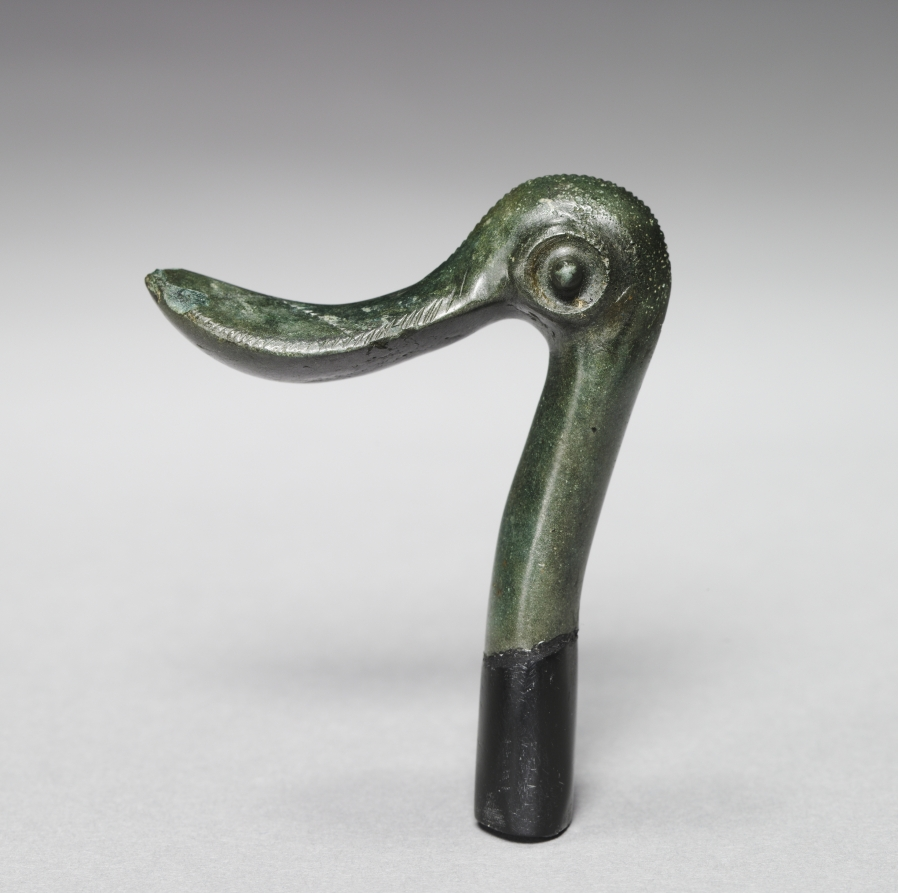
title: Duck Head Finial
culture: possibly Hungary, Bronze Age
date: c. 1400–1300 BCE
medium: bronze, cast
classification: Sculpture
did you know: A decorative object, this duck head finial likely topped a piece of furniture.